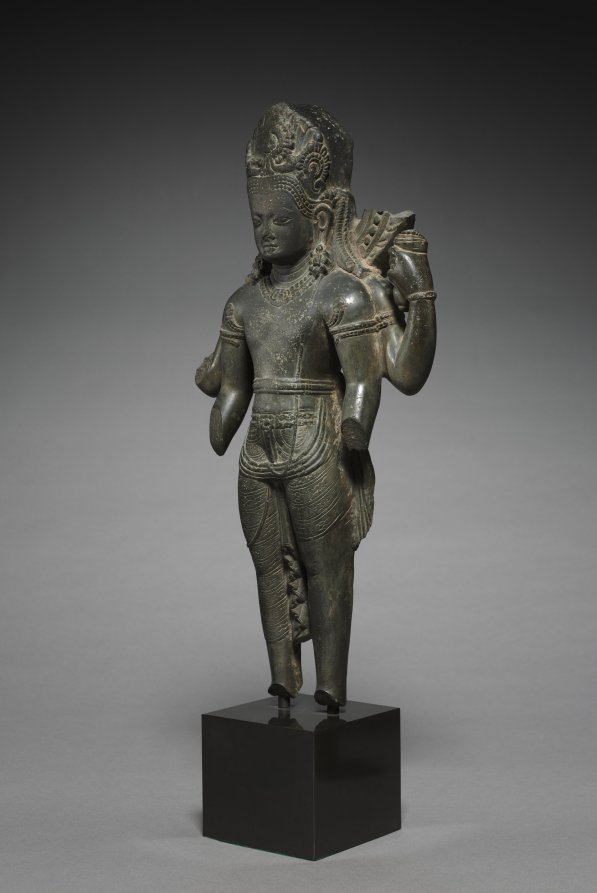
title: Vishnu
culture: Nepal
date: 800s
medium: schist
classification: Sculpture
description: The axial stance and somber expression visually amplify the powerful nature of this four-armed Hindu god. The crown and fine textiles communicate his regal qualities. In his upper left hand, a conch shell signals the start of battle or the sound of OM at the opening of a mantra recited to quell inner demons. Vishnu’s followers glorify his ability to destroy demonic forces that bring imbalance and disorder, both throughout the world and within oneself.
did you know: The dark stone was highly polished and once gleamed like bronze.